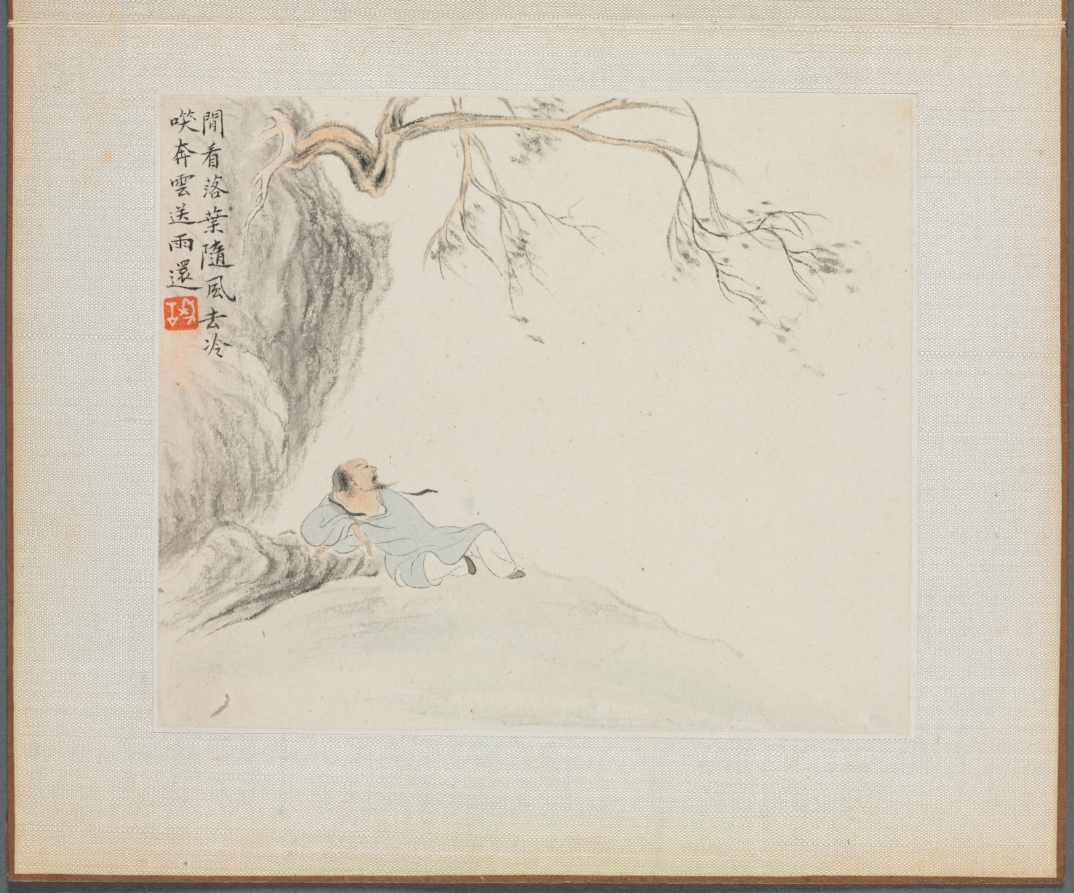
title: Album of Landscape Paintings Illustrating Old Poems: A Man Reclining and Enjoying the View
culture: China, Qing dynasty (1644-1911)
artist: Hua Yan (Chinese, 1682–c. 1765)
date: 1745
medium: album leaf, ink and light color on paper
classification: Painting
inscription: Calligraphy and seal, upper left corner